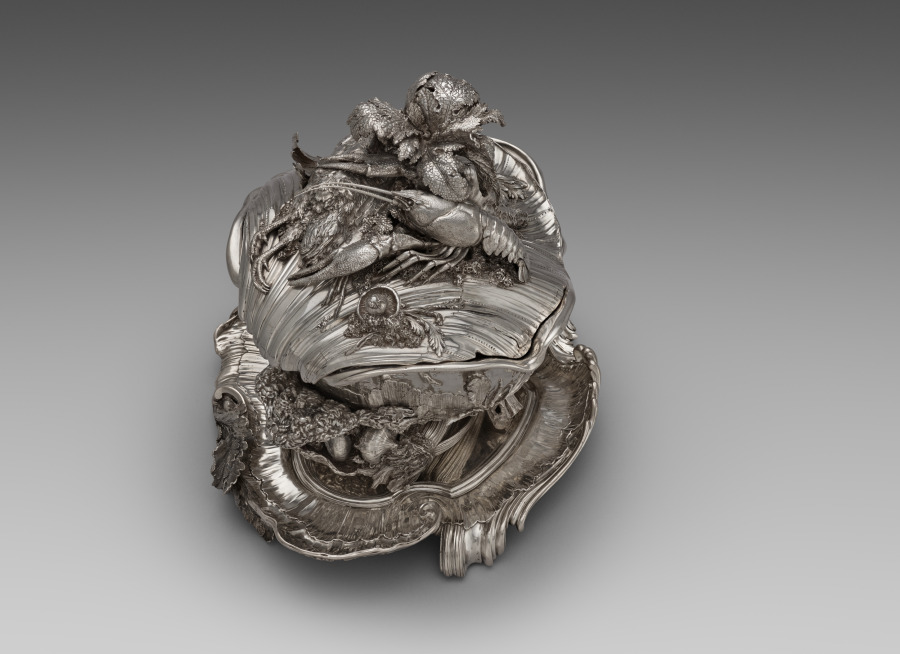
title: Covered Tureen on Stand (Pot-à-oille)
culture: France, Paris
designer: Juste-Aurèle Meissonnier (French, 1695–1750)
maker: Pierre-François Bonnestrenne (French)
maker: Henry Adnet (French, 1745)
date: 1735–38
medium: silver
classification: Silver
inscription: [Maker’s mark of Pierre−François Bonnestrenne, beneath platter; inside tureen (two marks)]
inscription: [Warden's mark for Paris, 1734−1735, beneath platter; inside tureen; inside cover]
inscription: [Charge mark of Hubert Louvet, Paris, 1732-1738, on platter border; beneath platter; beneath tureen; inside cover; inside tureen (two marks)]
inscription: [Discharge mark of Louis Robin mostly used for stamping small work, Paris 1738−1744, on platter border; beneath tureen]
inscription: [Warden's mark for Paris, 1736−1737, on platter border]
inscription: [Possibly British import mark, London, 1925, on platter border]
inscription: [Possibly mark of the British firm Charles & Richard Comyns, on platter border]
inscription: [Discharge of Louis Robin mostly used for stamping gold and silver between 1738 and 1744, beneath tureen; outside cover]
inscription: [Maker’s mark of Henry-Guillaume Adnet, inside cover]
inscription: [Two small undefined marks, inside cover]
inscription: [Under the surface of the platter the engraved signature]: “FAIT-PAR-I-A-MEISSONIER-ARCHITECTTE”; [and the weight] “673=5"; “No. [v] I 50 £ b76Sol”; [and the numbers] “A nº 1”; “A nº2”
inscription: [On tureen lip]: "MEISSONIER"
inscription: [On tureen lip]: “A nº 3”; “A nº2” [in order to place the tureen correctly on the stand]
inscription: [Numbers engraved on the stand, the tureen, and the cover to show how the piece should be assembled]: “A nº 1” [on the base of the tureen; beneath the cover; on the platter], “A nº 2” [on the platter], “A nº 3” [on the exterior rim of the tureen], “A nº4”; “A nº 5” [outside the cover], “A nº 7” [on the border of the platter]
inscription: [Two warden's marks for Paris, 1735-1736, beneath tureen]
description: This tureen exemplifies the French Rococo style, an artistic movement celebrating naturalistic forms that developed in Paris during the early 1700s. In contrast to classical, controlled symmetry, Rococo forms morph, twist, and spill into the space around them. Meissonnier embellished this tureen in a picturesque arrangement of vegetables and creatures, transforming a utilitarian object into a decadent display of wealth and abundance. This masterpiece comes from a set of two tureens commissioned by the English Duke of Kingston during an extended stay in Paris in the 1730s.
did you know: The langoustine, pigeon, and vegetables were cast using real examples giving the silver copies lifelike detail and appearance.